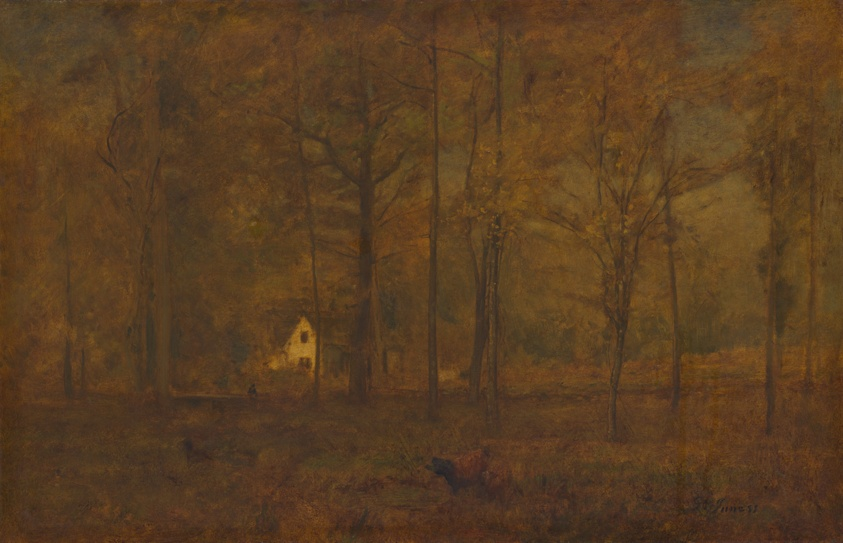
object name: Painting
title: Autumn Woods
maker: George Inness (American, 1825–1894)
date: 1891–94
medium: Oil on canvas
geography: United States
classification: painting; american arts